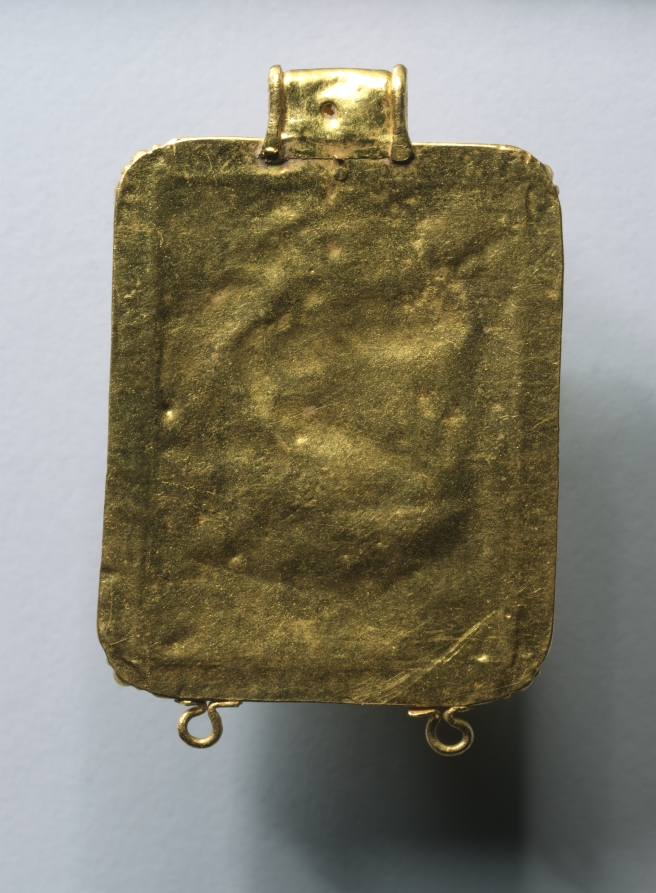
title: Daedalic Pendant with Potnia Theron (Mistress of the Animals)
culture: Eastern Greece, Rhodian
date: 650–600 BCE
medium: gold and glass-like substance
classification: Metalwork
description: This pendant, received in 2001 (2001.157), was probably originally from the same necklace as the nearly identical pendant acquired by the museum in 1999 (1999.88). Both depict the goddess Potnia Theron, the “mistress of the animals,” a deity sometimes associated with the Greek goddess Artemis. The goddess stands in a frontal pose with upswept wings, one curving above each shoulder. A feline rears up on either side of her, pulled by a leash held in each of her clenched fists.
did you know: The central decoration was likely made by burnishing a sheet of gold on a wood, stone, or ceramic form.